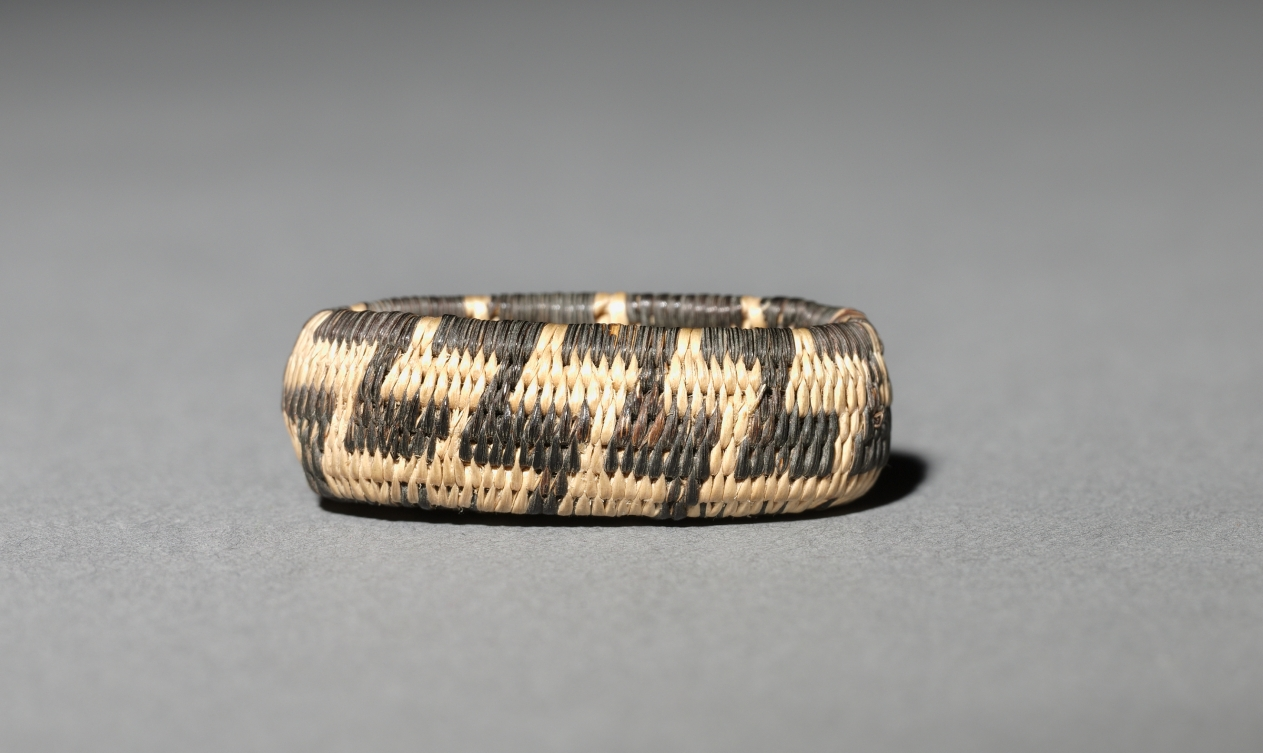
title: Miniature Rhomboidal Basket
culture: California, Pomo, late 19th-early 20th century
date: late 1800s-early 1900s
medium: plant materials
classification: Basketry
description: Miniature baskets were made to demonstrate the basket-maker’s virtuoso skill, and these tiny marvels seem to be no exception—the smallest are just a few millimeters wide but still patterned. For such fine work, dexterity was required as much for preparation of materials as for weaving.